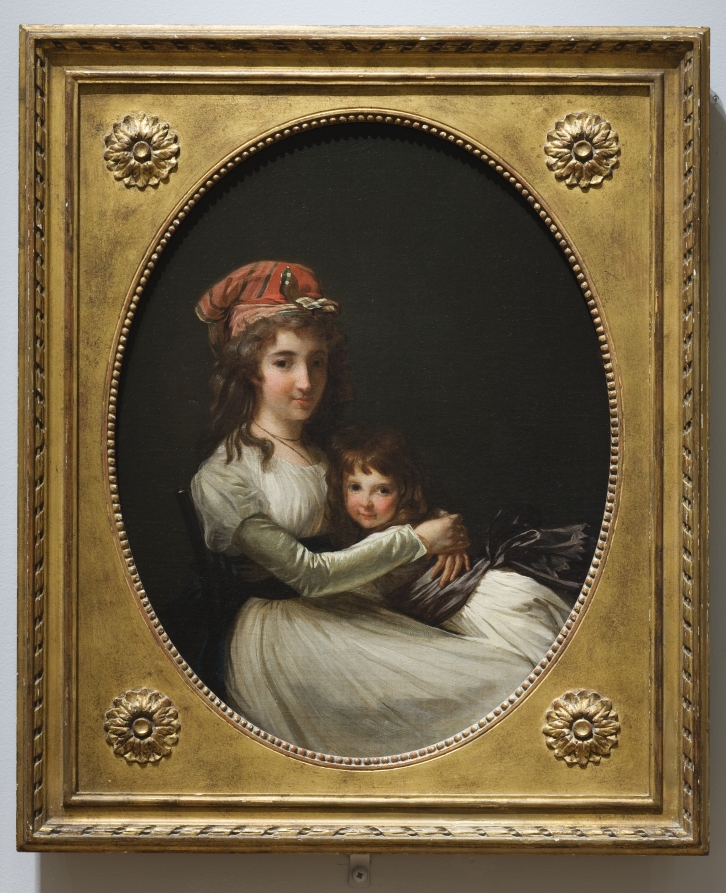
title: Portrait of a Mother and Daughter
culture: France, 18th century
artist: attributed to Henri-Pierre Danloux (French, 1753–1809)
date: c. 1794–95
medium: oil on canvas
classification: Painting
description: Though flowing loose and free across her shoulders, the woman’s hair is partly bound up in a red kerchief, a tell-tale sign she is an active participant in the French Revolution. The painting also celebrates primary values of the Revolutionary period--close family bonds and, especially, the mother’s role in raising children--by depicting an intimate connection between mother and daughter.